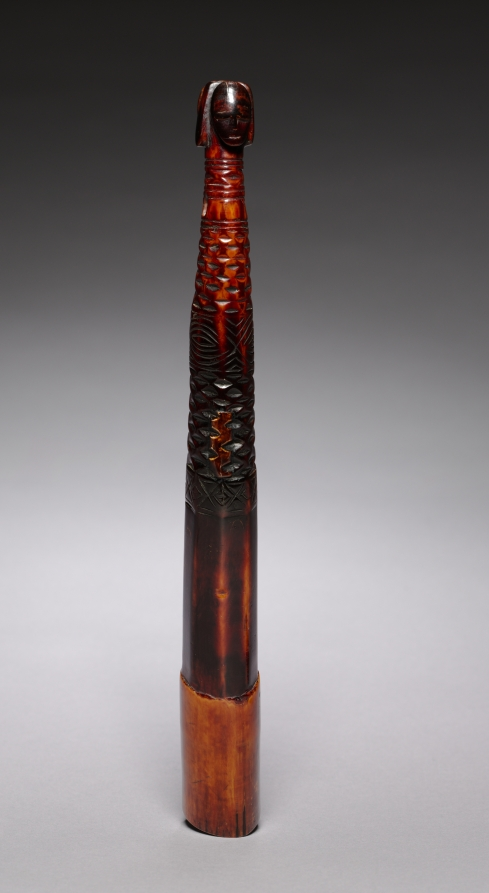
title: Side-Blown Trumpet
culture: Equatorial Africa, Cameroon; Fang, 19th century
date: late 1800s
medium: Elephant ivory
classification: Musical Instrument